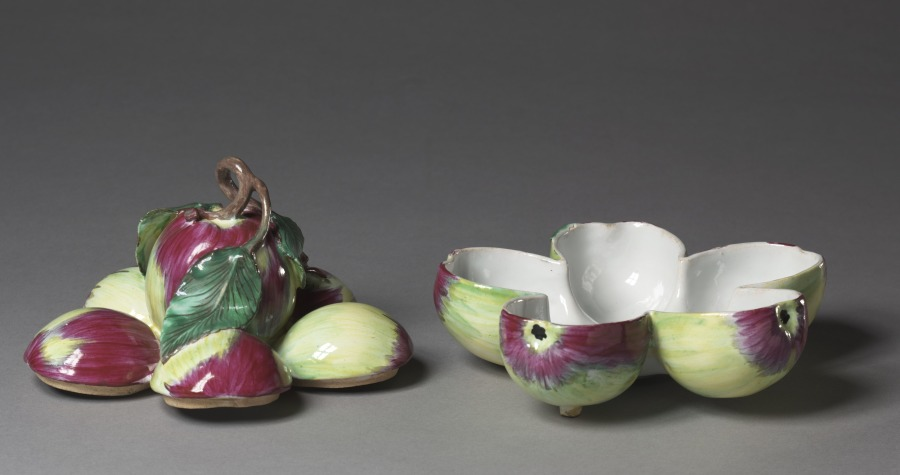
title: Covered Box in the Form of Apples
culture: France, 18th century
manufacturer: Sceaux Factory (French, active 1748–66)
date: c. 1760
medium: Tin- glazed earthenware (faience) wth enamel decoration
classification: Ceramic